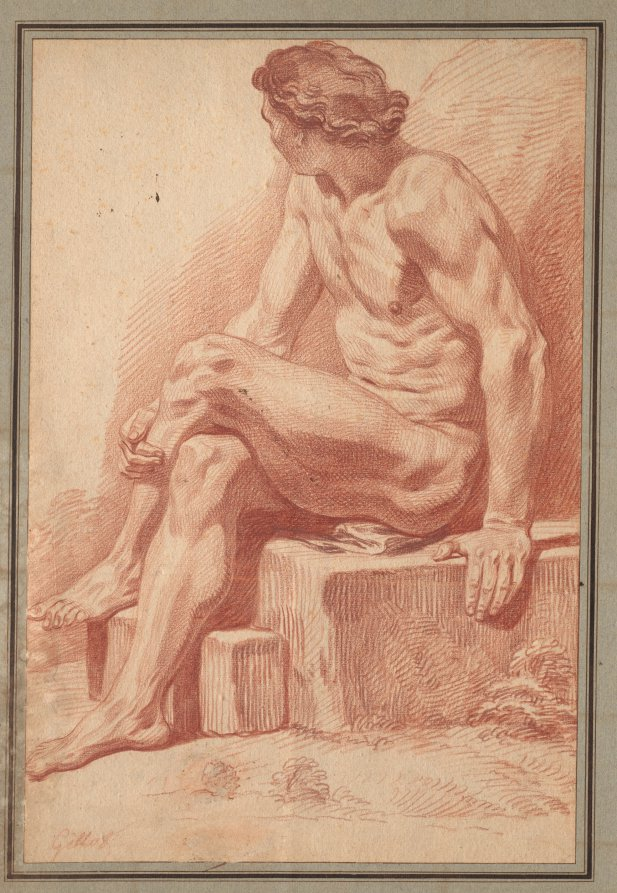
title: Seated Male Nude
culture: France, 18th century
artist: Claude Gillot (French, 1673–1722)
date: 1693–95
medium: red chalk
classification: Drawing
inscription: Signed, lower left in sanguine: Gillot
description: Michelangelo’s masterful rendering of the male nude set the standard for many generations of artists studying in academies across Europe. Life drawings (made from nude models) became so essential to an artist’s training at the Royal Academy of Painting and Sculpture in Paris (founded in 1648 by Louis XIV) that finished drawings like these were commonly called academies. Louis de Boullogne served as a professor of life drawing at the Royal Academy between 1694 and 1715. This work reflects the common practice of drawing from models. Here, the pose of the red chalk academie by Claude Gillot is reminiscent of the twisting male bodies on Michelangelo’s Sistine Chapel ceiling. Gillot may have seen prints or drawings of Michelangelo’s figures, though his model is more visually connected to the studio: for example, he drew the model’s stone perch as well as the drape tucked beneath his body.